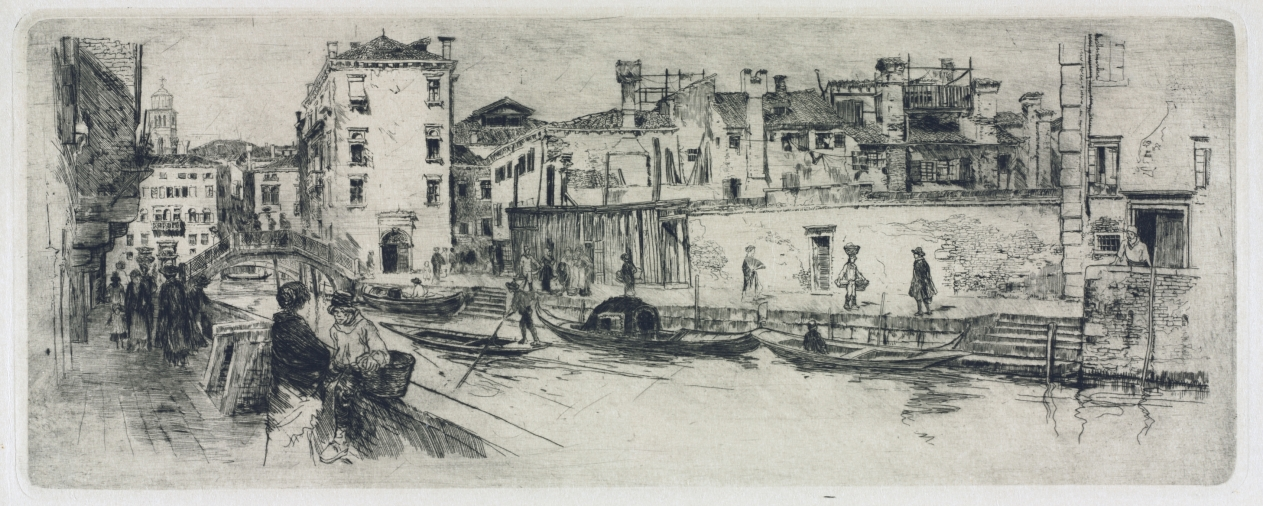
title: San Trovasso Canal, Venice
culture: America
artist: Frank Duveneck (American, 1848–1919)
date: 1883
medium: etching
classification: Print